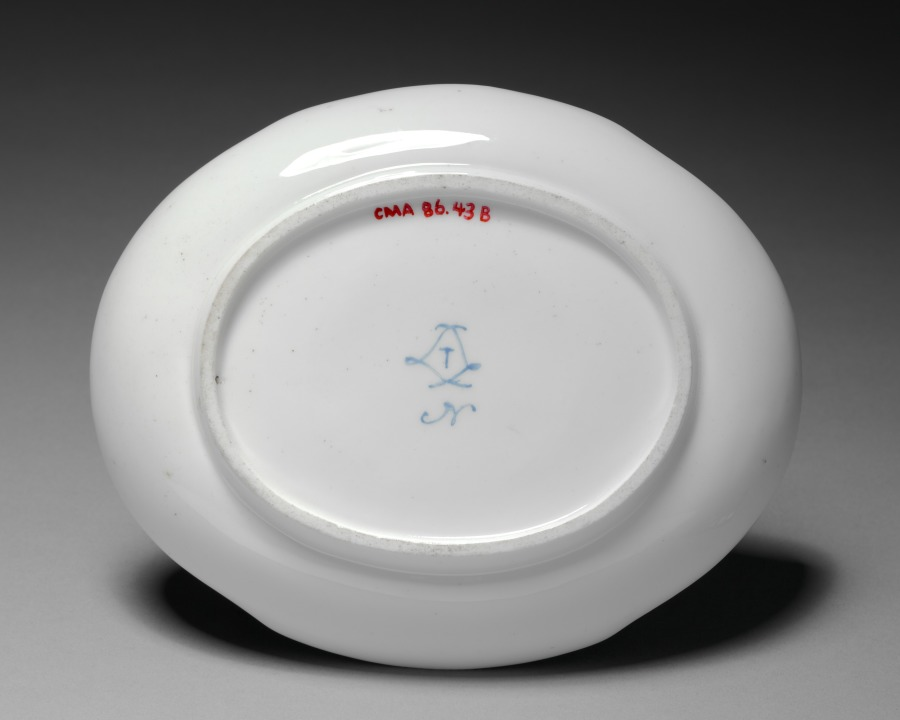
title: Stand for a Broth Bowl (Plateau Ovale)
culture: France, Sèvres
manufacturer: Sèvres Porcelain Factory (French, est. 1756)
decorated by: François-Joseph Aloncle (French)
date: 1772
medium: soft-paste porcelain with enamel an gilt decoration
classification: Ceramic